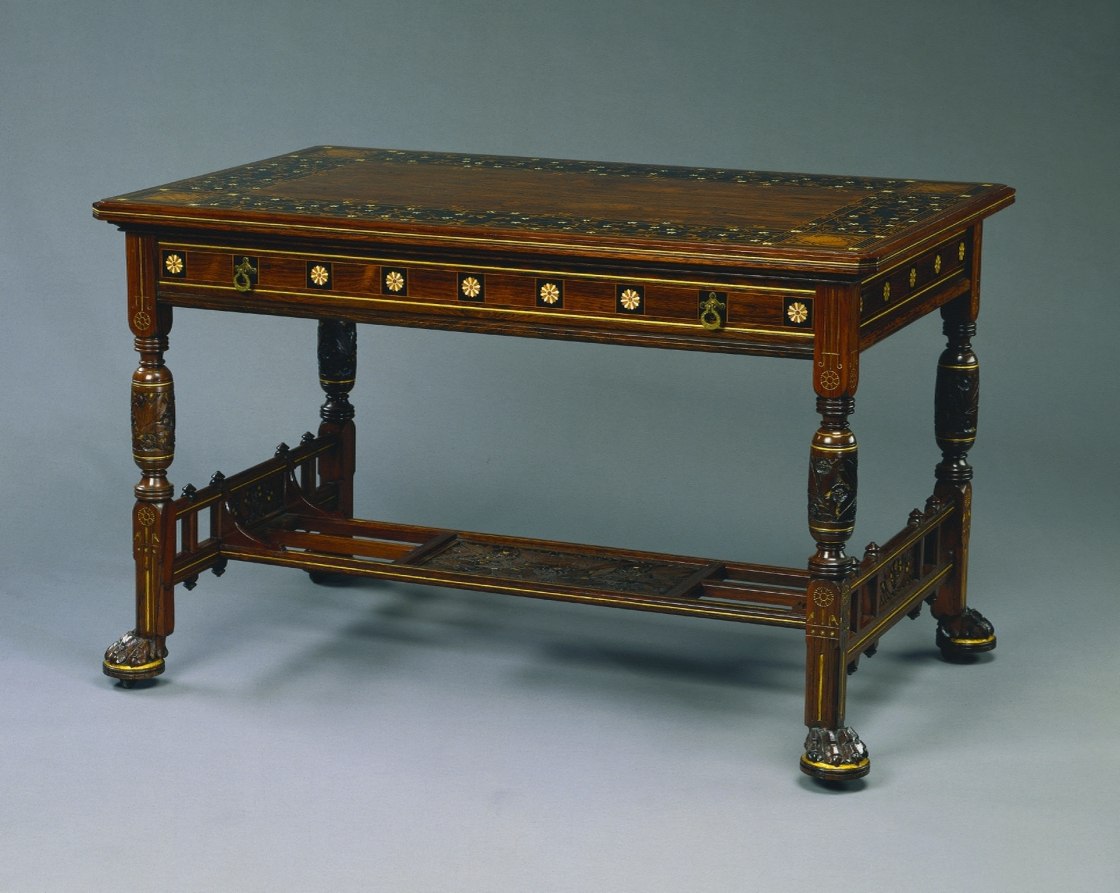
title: Center Table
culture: America, New York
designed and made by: Herter Brothers (American)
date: c. 1875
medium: rosewood inlaid with other woods and bone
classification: Furniture and woodwork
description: The general form of this table is based on 19th-century English pieces that are variously described as modern Gothic or Eastlakian. They tend to be rectilinear with incised ornament, and are often, as here, gilded. Combined with this form are decorative elements of Japanese derivation—the carved panel of the stretcher and the inlaid medallions on the frieze beneath the top. The elaborate marquetry, or inlay, of the top includes motifs of classical origin. The top was perhaps made in France and imported to America to be used on furniture made here.